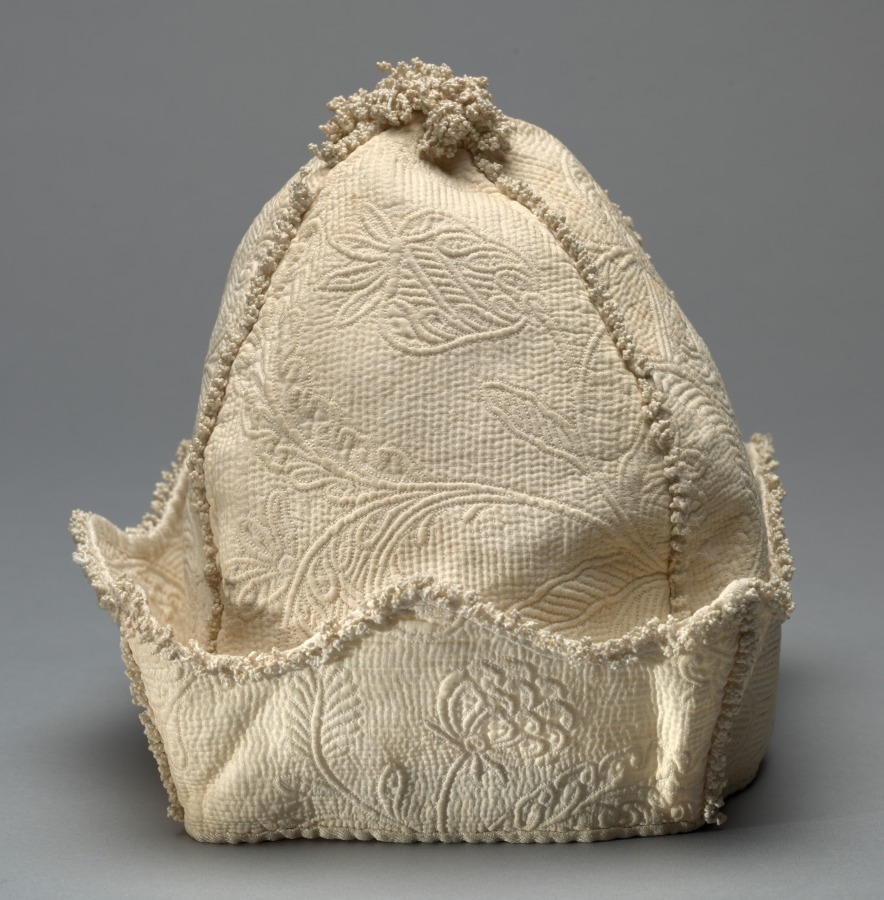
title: Man's Cap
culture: Denmark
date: 1600s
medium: linen with cotton design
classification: Garment